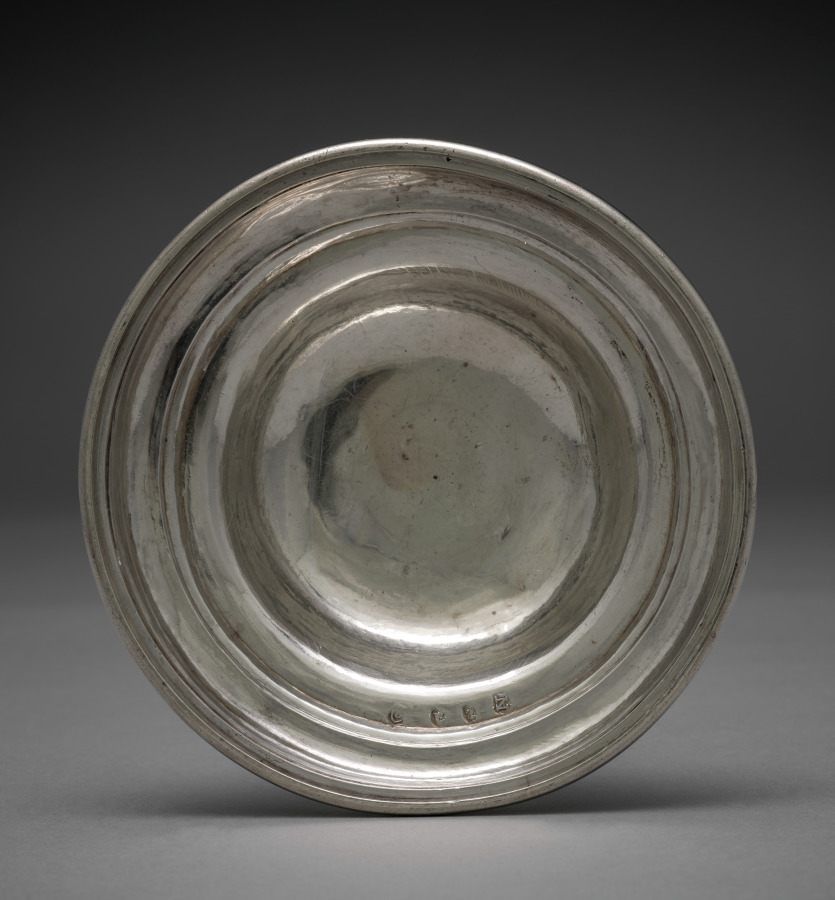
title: Two-Handled Cup (lid)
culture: England, London, 18th century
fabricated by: Anthony Nelme (British)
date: 1712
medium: silver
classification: Silver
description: Nelme was one of the most famous and successful native English silversmiths of a time when Huguenots (French Protestants) dominated the creation of richly decorated pieces for the most fashionable market.